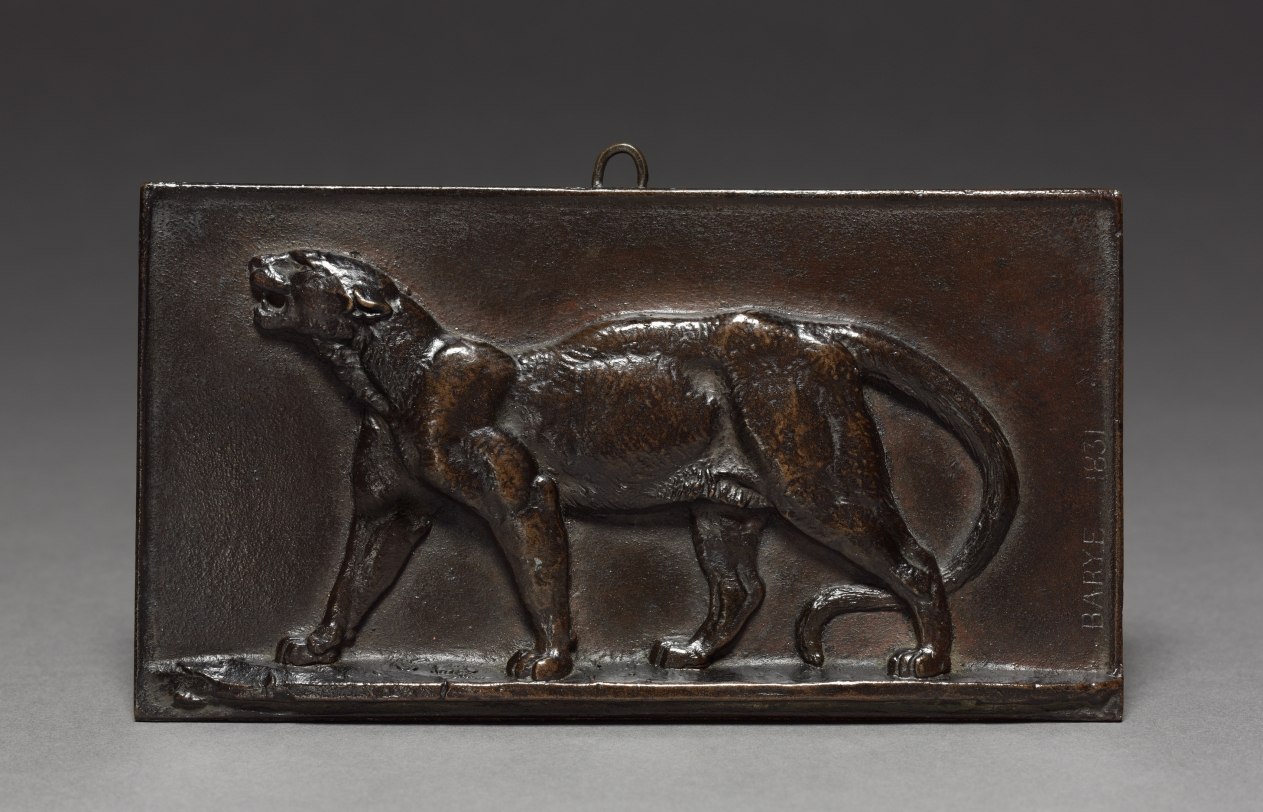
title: Walking Leopard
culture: France, 19th century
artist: Antoine-Louis Barye (French, 1796–1875)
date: 1831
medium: bronze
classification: Sculpture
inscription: Inscribed right edge: "BARYE 1831"